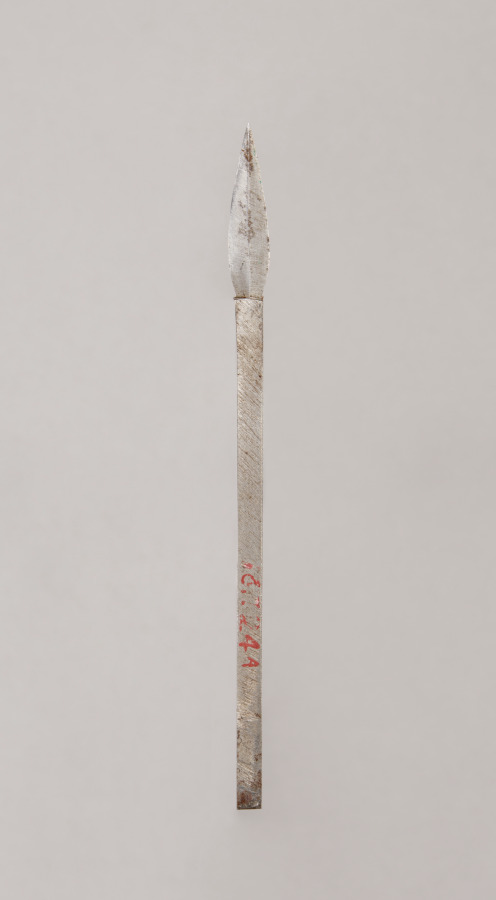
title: Scabbard Spear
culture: Africa, East Africa, Sudan, unknown maker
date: 1880–1910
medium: metal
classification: Arms and Armor